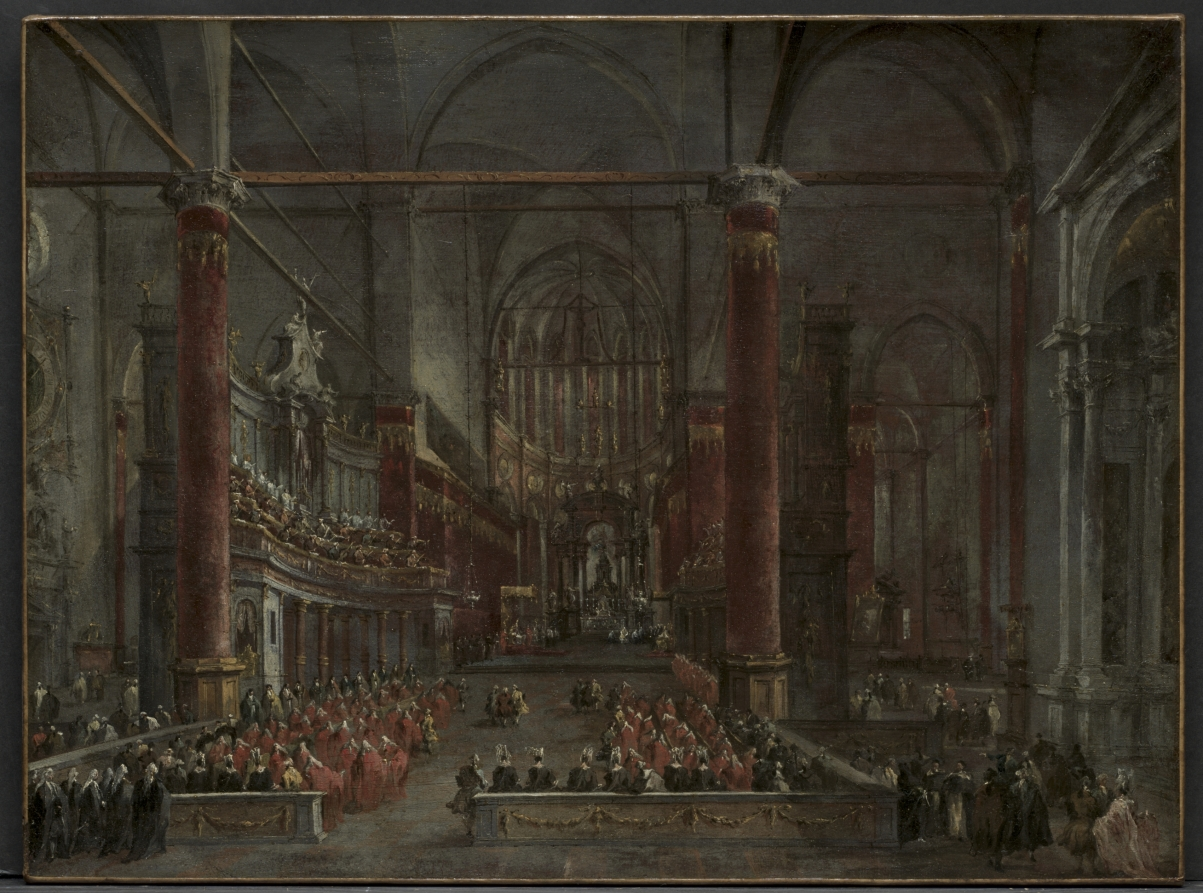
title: Pontifical Ceremony in SS. Giovanni e Paolo, Venice, 1782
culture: Italy, 18th century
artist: Francesco Guardi (Italian, 1712–1793)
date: c. 1783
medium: oil on canvas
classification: Painting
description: The second scene in the series depicts Pius VI celebrating mass in the Basilica of Santi Giovanni e Paolo, one of the largest churches in Venice and the pope’s residence during his stay. The mass included a performance of the Te Deum, a prayer of thanksgiving set to music by the Venetian composer Antonio Vivaldi (1678–1741). Traditionally, the Te Deum was recited in thanks to God for a special blessing, including a papal election or a royal coronation, and thus was appropriate for this historic papal visit.